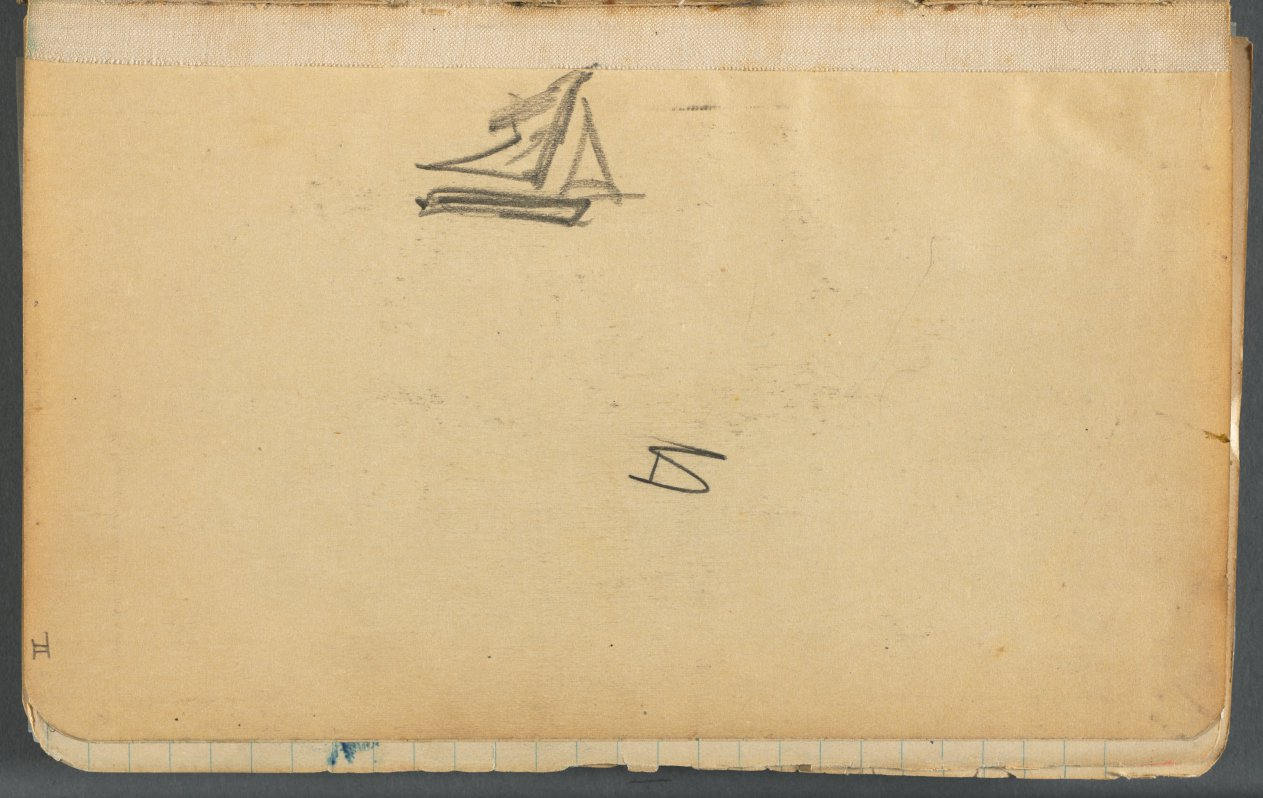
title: Sketchbook, (II): Sailboats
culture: America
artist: Maurice Prendergast (American, born Newfoundland [now Canada], 1858–1924)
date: 1905–10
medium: graphite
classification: Bound Volume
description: This sketchbook contains 69 pages of drawings, a diary largely devoted to the state of the artist's health, and a three-page discourse on the nature of genius and ideas.